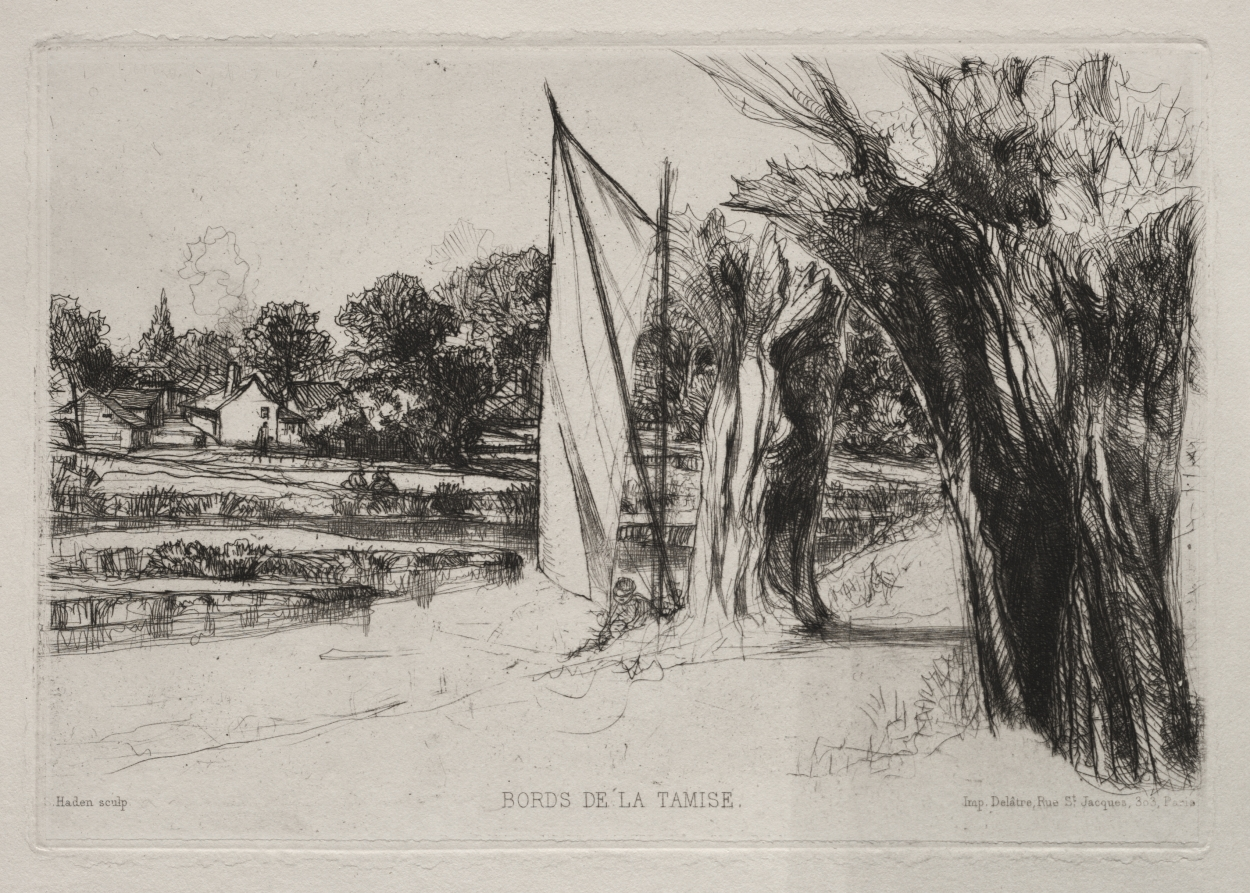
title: Thames Ditton - With a Sail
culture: England, 19th century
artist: Francis Seymour Haden (British, 1818–1910)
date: 1864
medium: etching and drypoint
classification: Print